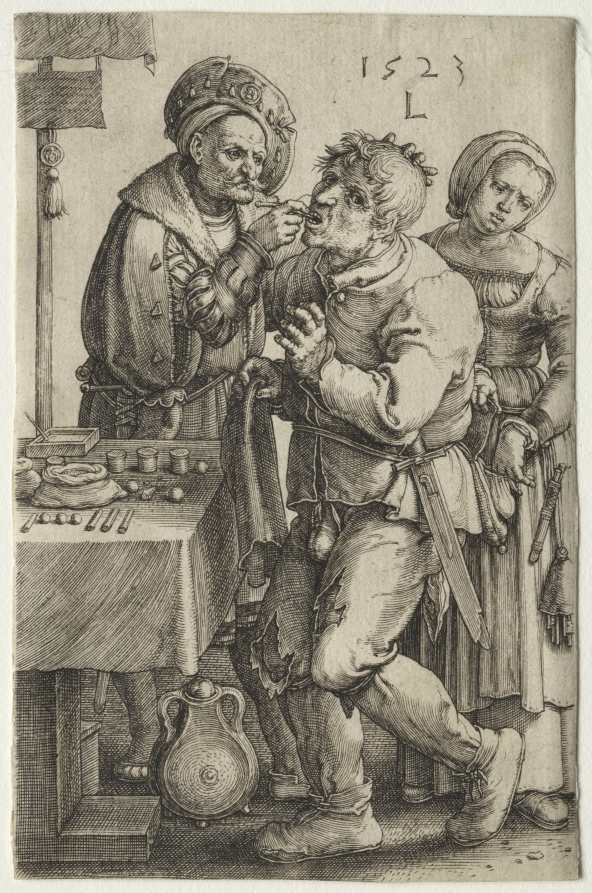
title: The Dentist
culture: Netherlands, 16th century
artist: Lucas van Leyden (Netherlandish, 1494–about 1533)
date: 1523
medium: engraving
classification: Print